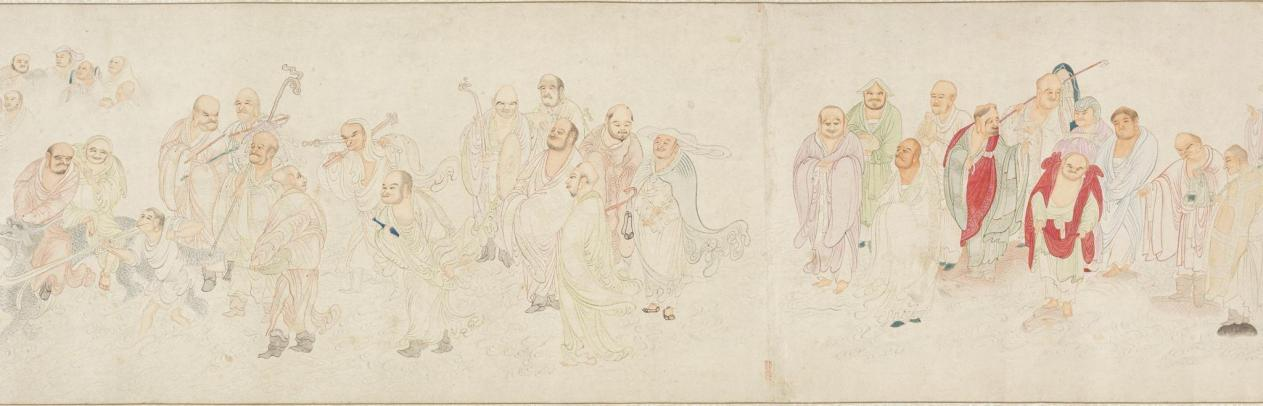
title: Returning to the Village in a Rainstorm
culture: China, Ming dynasty (1368–1644)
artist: Xie Shichen (Chinese, 1487–after 1567)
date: 1530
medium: Handscroll; ink and light color on silk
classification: Painting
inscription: 風雨歸村圖 嘉靖庚寅秋日樗仙謝時臣. [印] 謝時臣印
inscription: 3 additional seals unidentified.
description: This scroll depicts a wind- and rainswept landscape with figures in the countryside struggling against a late summer monsoon rainstorm. Such weather was familiar to residents of the lower Yangzi delta. Xie Shichen spent most of his life in the Suzhou area. Details of his career are scant, but his surviving works suggest that he made his living as a professional painter. This painting conveys drama and anecdotal observations, characteristic of Zhe school paintings, such as the one by Lü Wenying, CMA 1970.76.